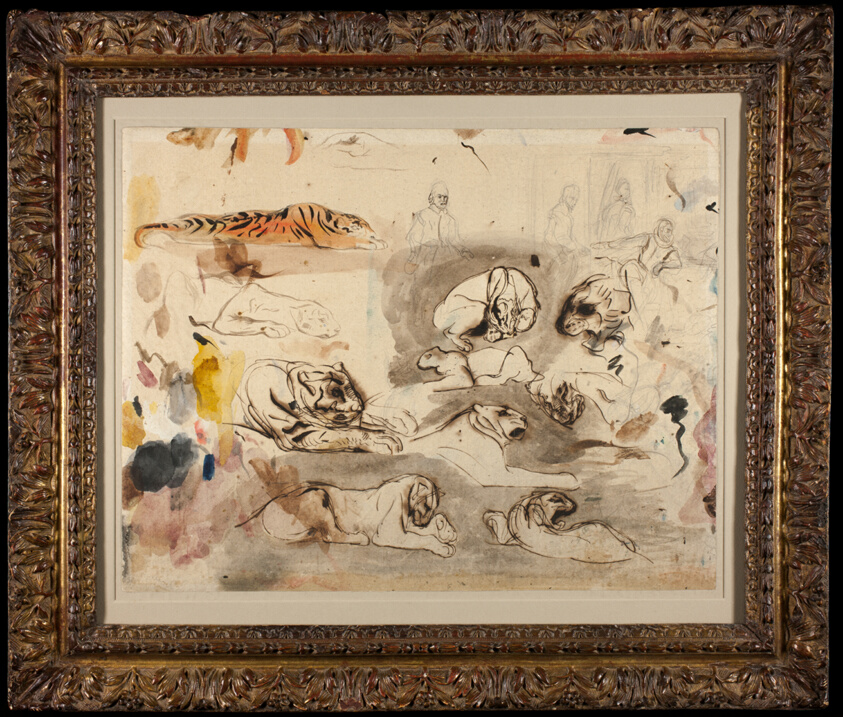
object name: Drawing and Watercolor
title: Sketches of Tigers and Men in 16th Century Costume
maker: Eugène Delacroix (French, 1798-1863)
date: 1828–29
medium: Watercolor, pen and iron gall ink, and graphite, on ivory laid paper with blue fibers (discolored to buff)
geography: France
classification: drawings (visual works); prints and drawing